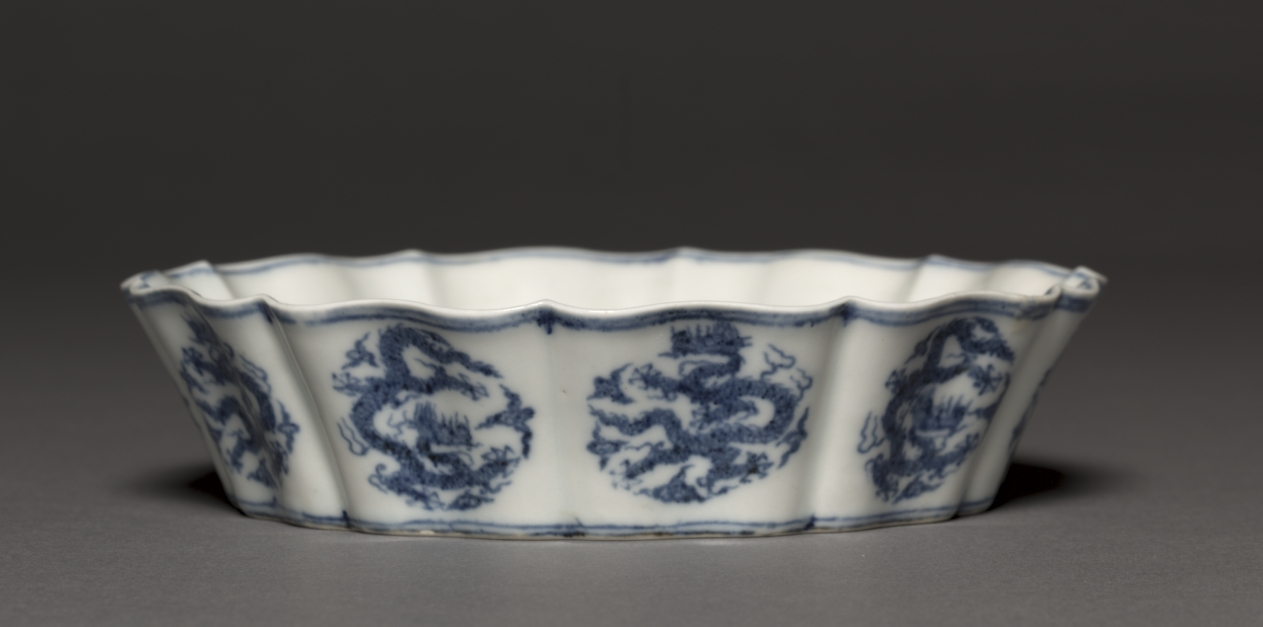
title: Brush Washer with Dragons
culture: China, Jiangxi province, Jingdezhen, Ming dynasty (1368-1644), Xuande reign (1426-35)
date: 1426–35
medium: porcelain with underglaze blue decoration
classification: Ceramic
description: The attractive tonal range found in the painted decoration, resulting from the irregular size of cobalt bits in the pigment, and the pocked glaze surface identify this stunning brush washer as a classic Xuande period piece despite the absence of a reign mark.